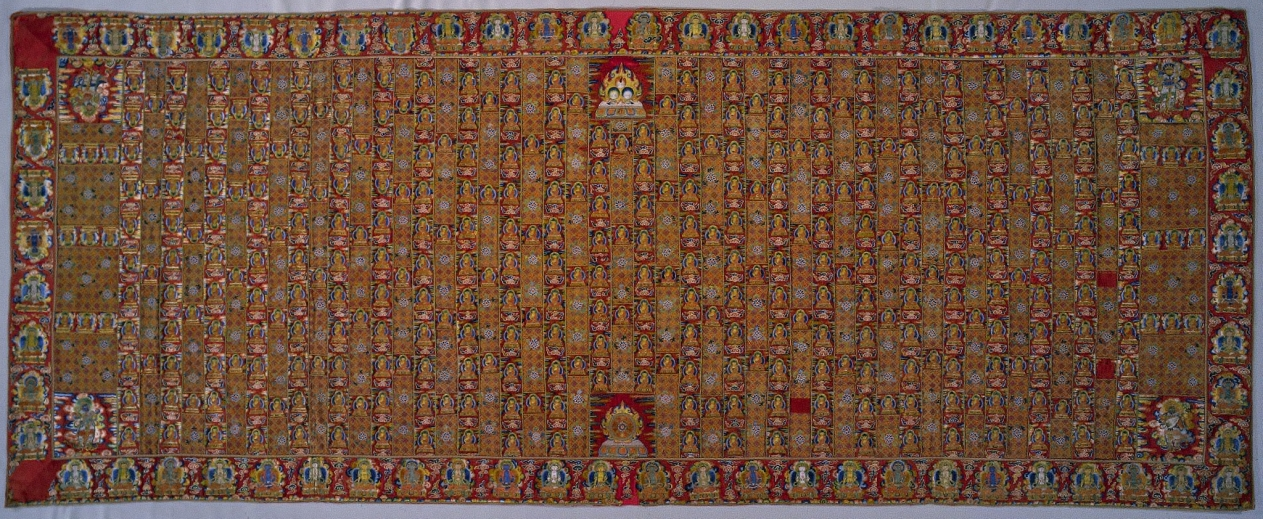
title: Buddhist Priest's Ceremonial Robe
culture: China, Ming dynasty (1368–1644)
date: 1400s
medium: silk and gold thread; embroidery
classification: Garment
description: This example of imperial embroidery is one of the earliest surviving Chinese Buddhist robes (kasaya) in the West. Depicting 991 Buddhas, each slightly different, it is constructed out of patches in reference to the legend in which the Buddha's favorite disciple divided a robe he was given into 30 pieces. Patchwork is also a sign of humility. Multiple Buddha images known as “thousand Buddha” designs are seen painted and sculpted on the walls of cave temples in India, Afghanistan, Central Asia, and China, but are rare on garments. The Four Heavenly Kings, guardians of the four directions, occupy the textile’s corners. When draped around the body, the inverted figures in the upper left corner appear right side up. Robes with 25 columns were worn by the highest-ranking clergy on ceremonial occasions.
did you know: The Five Transcendent Buddhas, who symbolize the purity of the five elements, are repeated around the edges.